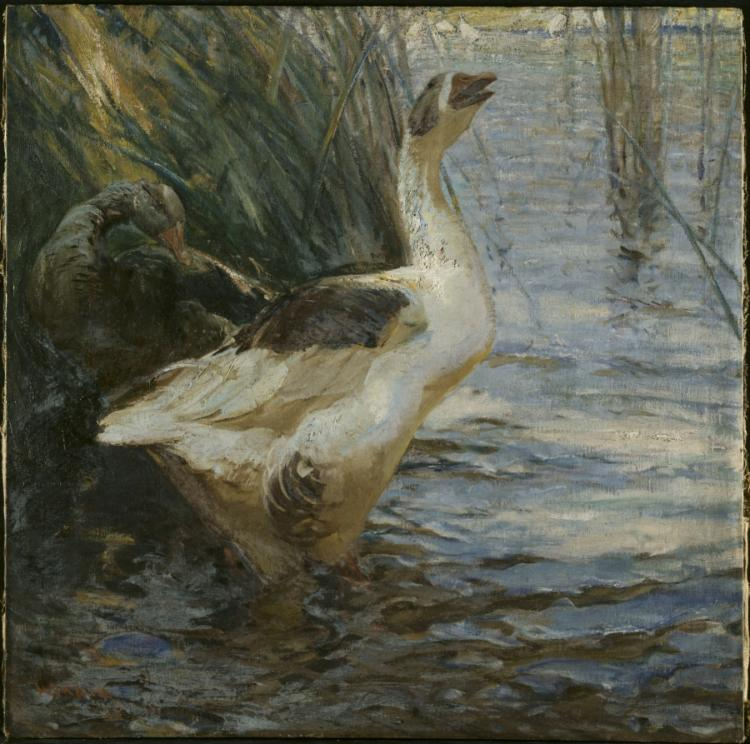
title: Disturbed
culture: America, Ohio, Cleveland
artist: Henry Keller (American, born Germany, 1869–1949)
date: 1908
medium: oil on canvas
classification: Painting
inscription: signed lower left: H. G. Keller, 08.